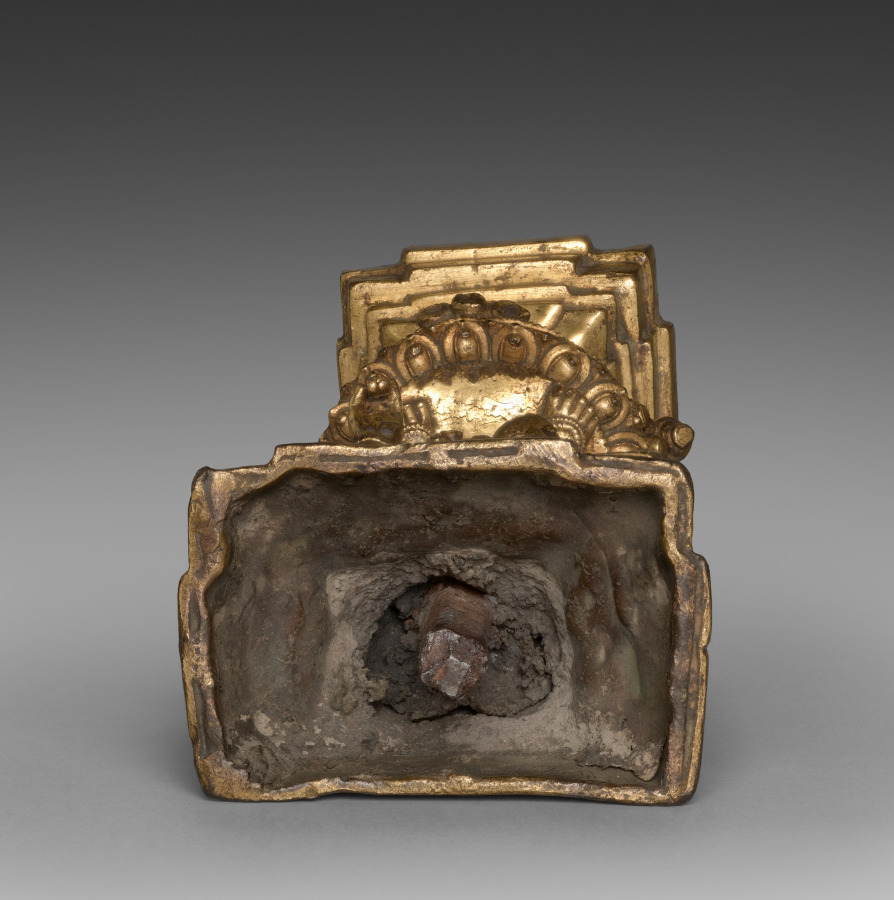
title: Support with Addorsed Figures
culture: Tibet, Densatil Monastery, 15th century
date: 1400s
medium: gilt bronze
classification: Sculpture